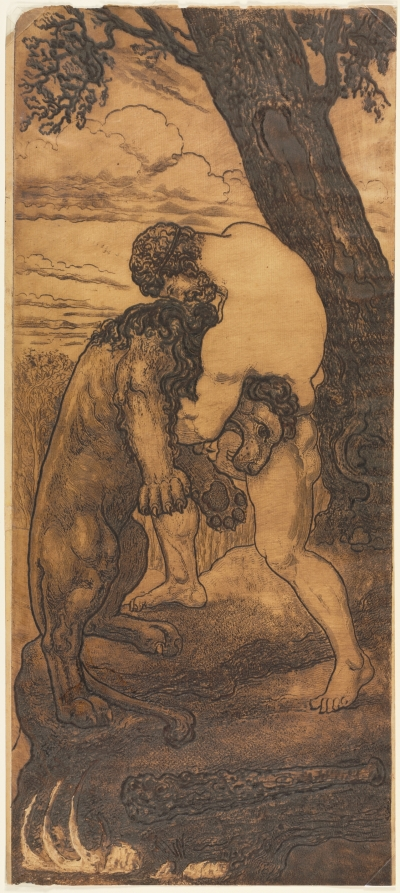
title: Hercules and the Nemean Lion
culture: France, 19th century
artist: Henri-Arthur Lefort des Ylouses (French, 1846–1912)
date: c. 1898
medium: gypsograph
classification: Print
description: Lefort des Ylouses used a combination of techniques to achieve the rich surface and variety of textures seen in Hercules and the Nemean Lion. Some lines, including outlines of forms, were bitten very deeply on the plate so that when printed, the paper was embossed for a three-dimensional, sculptural effect. The pattern on the rock beneath Hercules’s feet was obtained by putting a roughly textured paper on top of the etching ground and running the plate through the press, while the fine parallel lines in the sky are engraved. After the plate was inked, the artist carefully wiped its surface, leaving some areas dark brown and others pale beige. The Nemean lion was a vicious monster in Greek mythology. It survived because its golden fur was impervious to attack and its claws were exceedingly sharp. Hercules killed the Nemean lion by stunning it with his club and using his immense strength to strangle it to death.